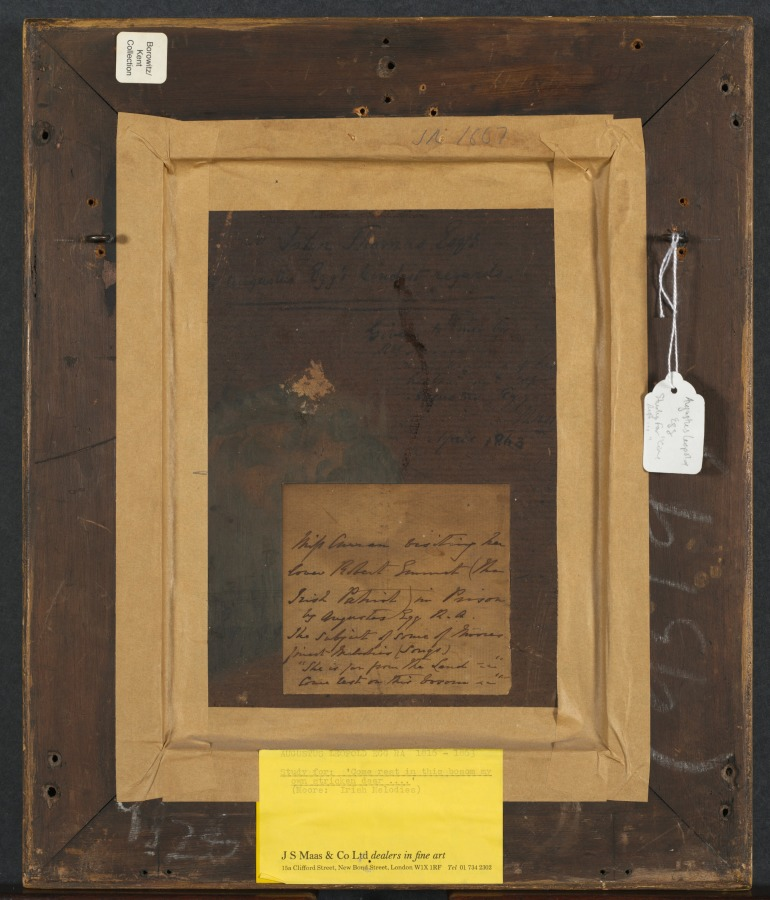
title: Study for "Come Rest in this Bosom my own Stricken Dear"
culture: England, 19th century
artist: Augustus Leopold Egg (British, 1816-c. 1863)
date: 1800s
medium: oil on board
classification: Painting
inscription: hand-written label affixed to back: "Moore's [Irish] songs... Come rest on this bosom."